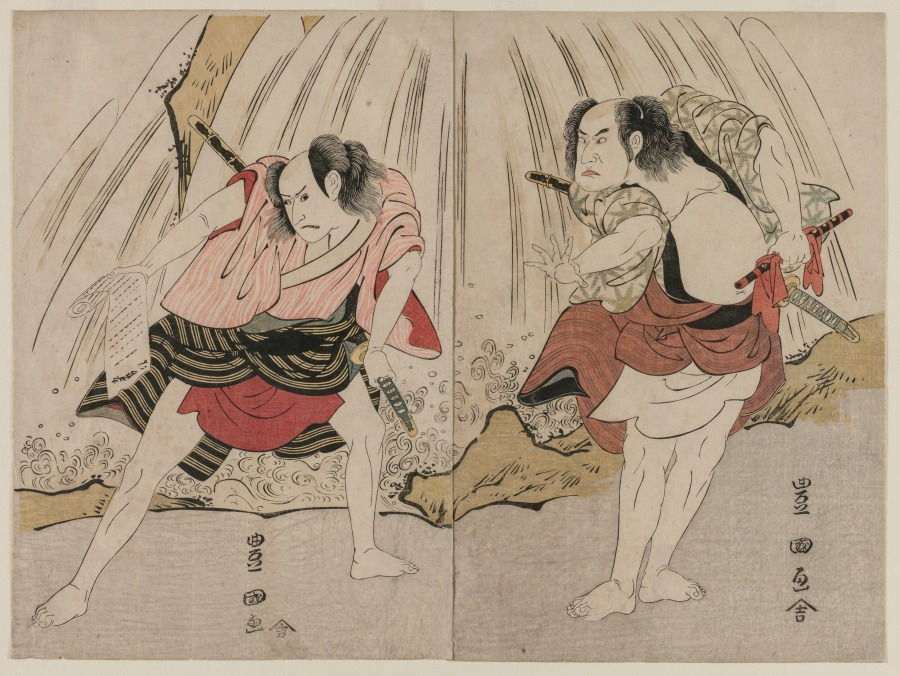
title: Kataoka Nizaemon VII and Ichikawa Yaozo III in a Confrontation Beside a Waterfall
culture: Japan, Edo period (1615–1868)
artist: Utagawa Toyokuni (Japanese, 1769–1825)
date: c. 1797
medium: color woodblock print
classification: Print